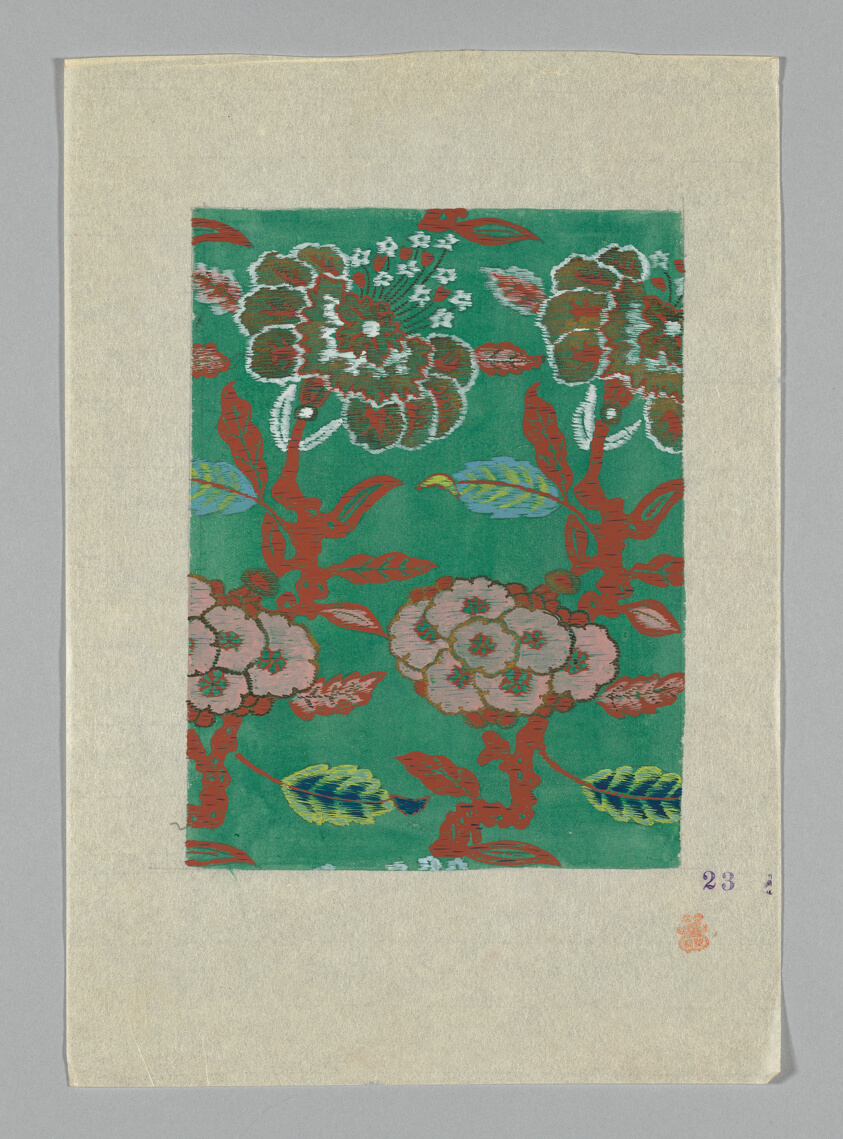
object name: Drawing and Watercolor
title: Design on Paper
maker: Japan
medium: Paper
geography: Japan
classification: textile; accessory - paper design; paper; watercolor